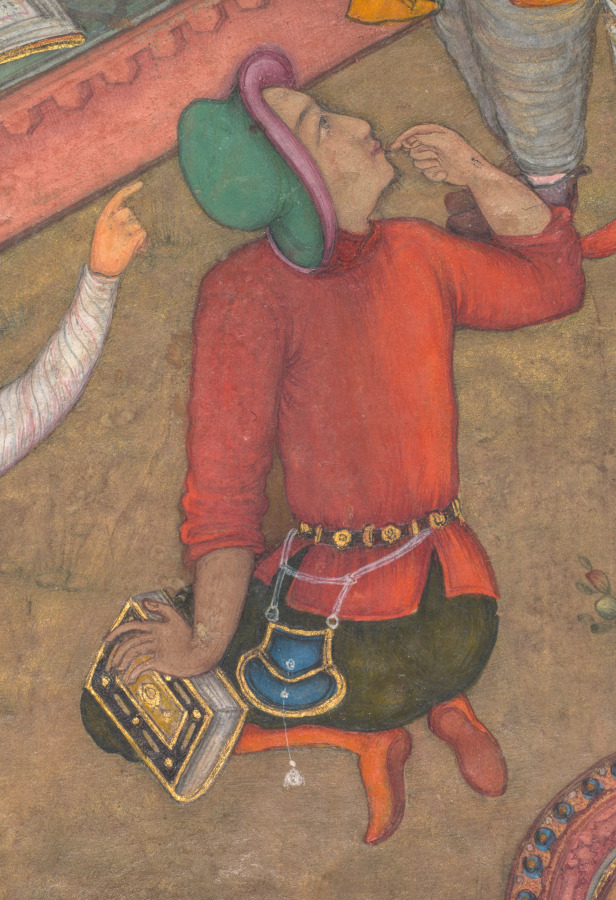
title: John the Baptist recognizes Christ by the appearance of a dove (folio 50 verso), from a Mirror of Holiness (Mir’at al-quds) of Father Jerome Xavier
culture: Mughal India, Allahabad, made for Prince Salim (1569–1627)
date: 1602–4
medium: Gum tempera, ink, and gold on paper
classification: Manuscript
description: Wearing the black robes and cap of a Jesuit priest, John the Baptist sits in a well-appointed Mughal-style courtyard. According to Father Jerome’s text, John recognizes Jesus by the dove who sits on his head. Possibly Father Jerome intended to relate the Gospel account that describes the dove of the Holy Spirit as hovering in the air above his head. The artist’s own reactions to this passage may be reflected in the expressions and gestures of the onlookers, who seem incredulous and bemused at this sign.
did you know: Jesus holds a rosary with a cross even in scenes prior to his crucifixion.